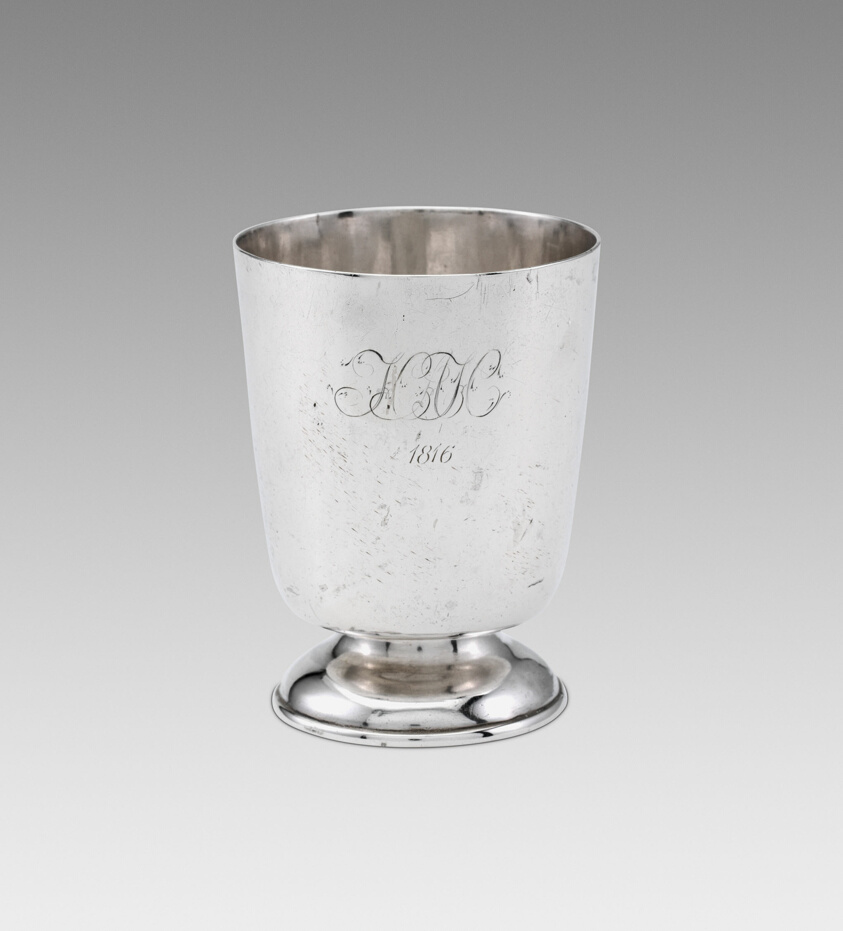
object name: Metalwork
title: Beaker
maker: William B. Heyer; American, 1776–1828; New York, NY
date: 1816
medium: Silver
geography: New York City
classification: drinking vessel; silver; american decorative arts; american arts; decorative arts